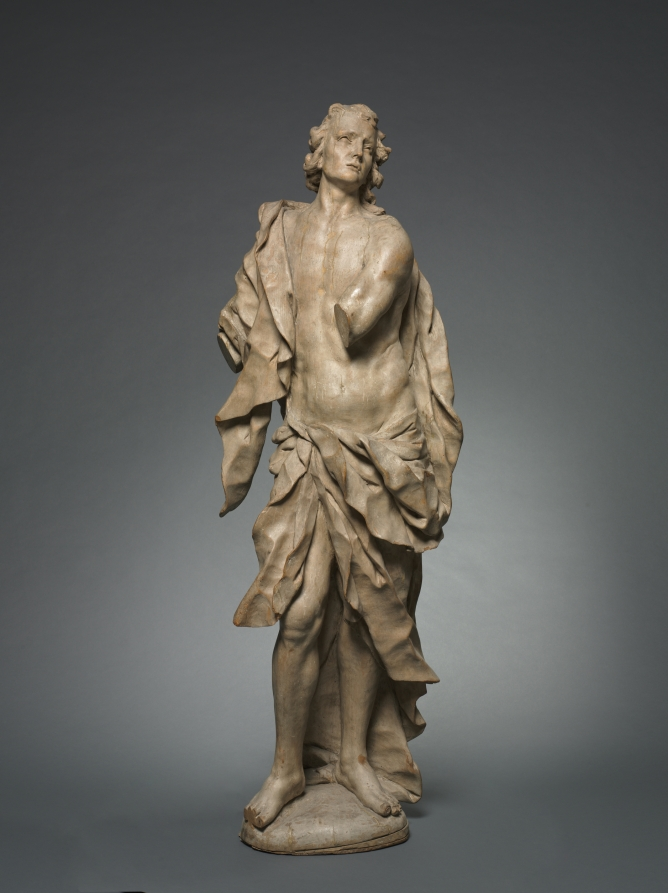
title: A Saint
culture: Germany or Austria, 18th century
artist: follower of Diego Francesco Carlone (Italian, 1674–1750)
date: c. 1730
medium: wood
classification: Sculpture